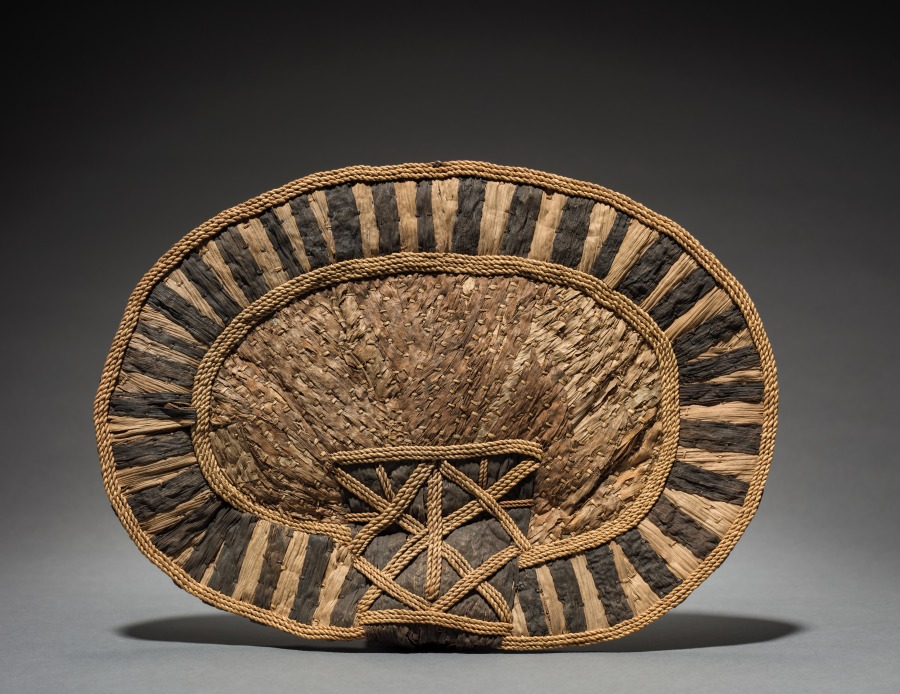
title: Back Skirt/Sitting Pad (negbe)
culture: Africa, Central Africa, Democratic Republic of Congo, Mangbetu-style makers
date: by 1928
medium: Plant fibers and dye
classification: Garment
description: Egbe (singular: negbe) were fashionable and practical garments aristocratic Mangbetu women made for special occasions. Worn over a skirt, it tied onto a girdle along with a frontal “apron.” The curved interior piece rested on the lower back. Thickly woven, flexible natural fibers bent with the body, cushioning the wearer’s behind when sitting. When the woman was standing, the decorated flat portion faced outward, showing off bold geometric motifs. Egbe were among items sold to foreigners at the Mangbetu king’s encouragement as the Mangbetu actively constructed their self image for outsiders during the 1920s and 1930s.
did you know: A curved "handle" on the negbe's interior allowed it to rest on the tailbone.